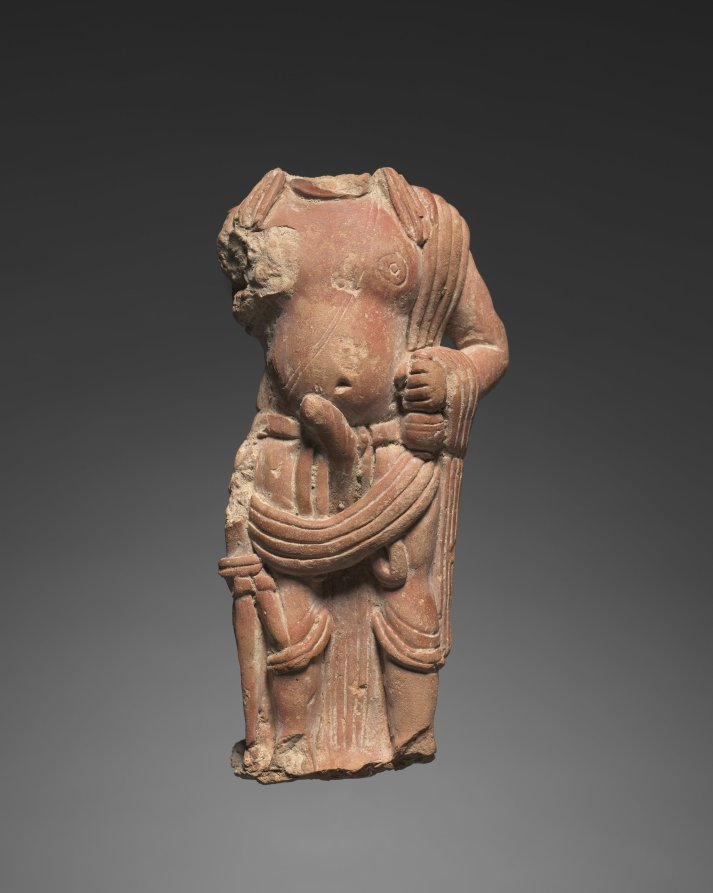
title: Male Fertility Divinity, Possibly Shiva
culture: Northern India, possibly Mathura, Kushan period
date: c. 120–200 CE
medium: terracotta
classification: Sculpture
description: This figure combines an unusual set of attributes. He has long dreadlocks over his shoulders, like an ascetic, and he holds a water pot, like a Brahmin or naga (serpent deity). Also, he seems to carry a sword and dagger like a warrior and is ithyphallic, indicating his virility and fecundity. He may best be identified as a local divinity worshipped for purposes of increasing fertility, but he could also be recognized as an early form of the Hindu god Shiva.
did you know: This sculpture was first made from a mold, then subsequently hand modeled.